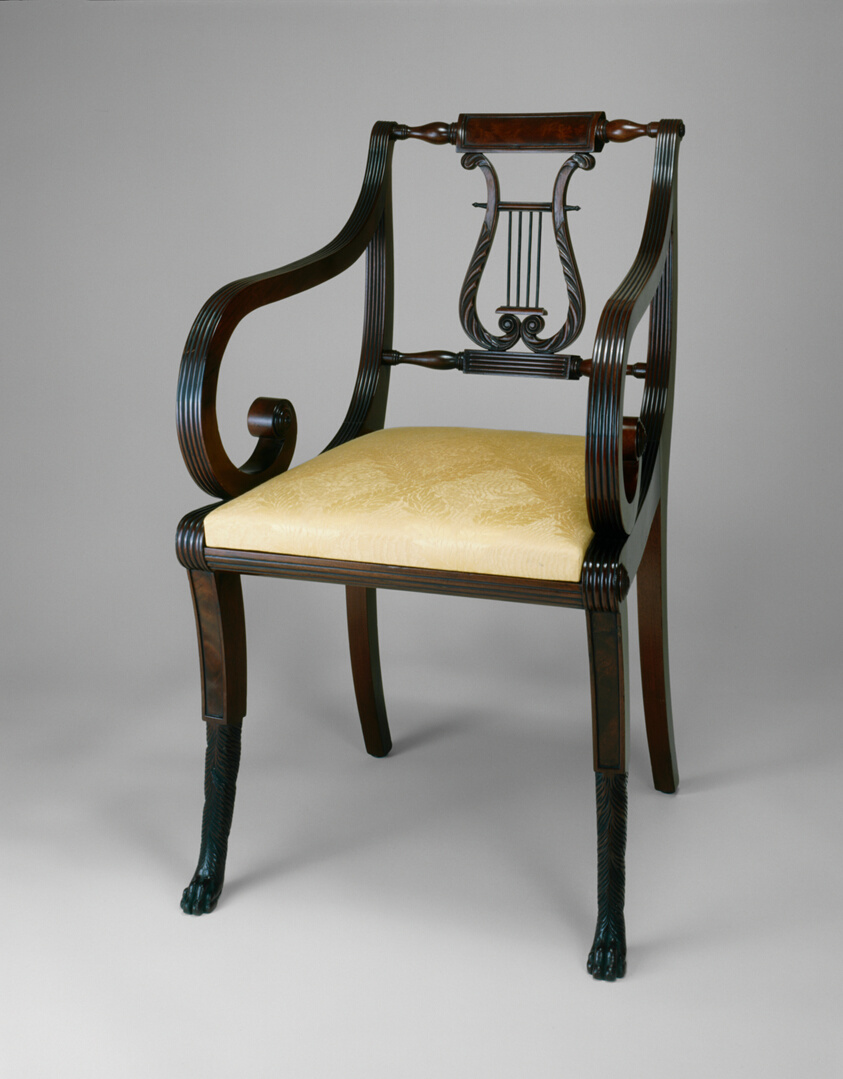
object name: Furniture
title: Armchair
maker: Artist unknown (American, 18th–19th century); New York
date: c. 1815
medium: Mahogany and upholstery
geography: New York City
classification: seating; furniture; american decorative arts; american arts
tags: furniture